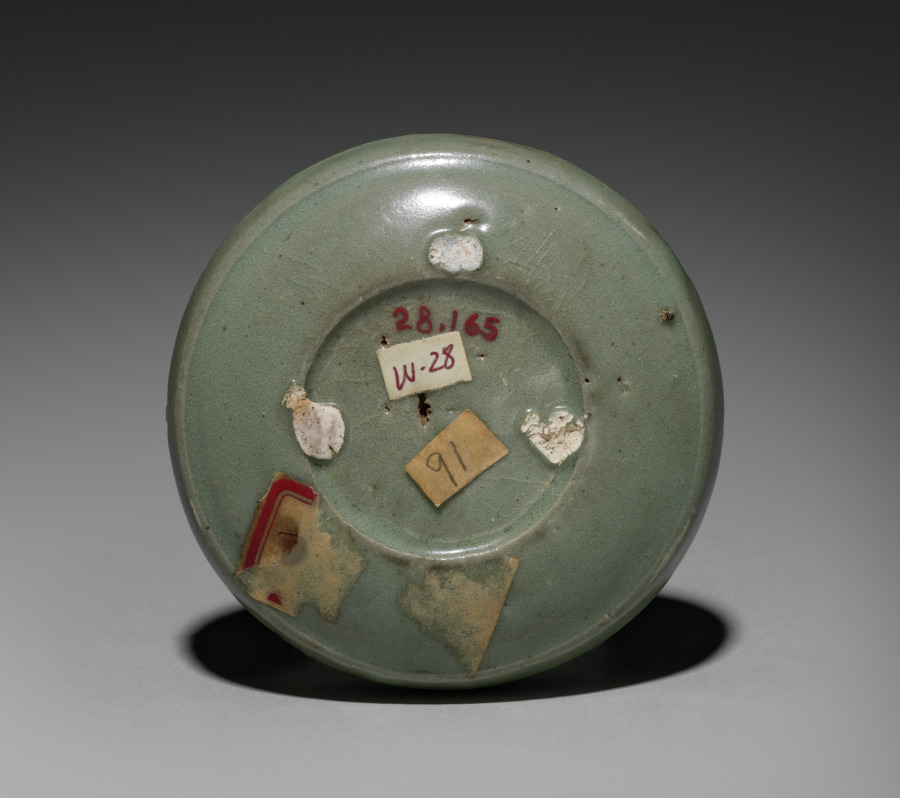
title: Pigment Box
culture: Korea, Goryeo dynasty (918–1392)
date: 918–1392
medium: inlaid celadon ware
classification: Ceramic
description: Celadons, spoons, seals, and bronze mirrors were the most common burial objects in tombs during the Goryeo period (918-1392). Once used to contain colored powder, rouge, and eyebrow gel for makeup, this small container was one of the standard goods that furnished elites' tombs. Both women and men used the grain powder of rice or millet for whitening their skin, safflower extract for rouge, and plant ash or soot for eyebrow gel. Yet, natural-looking make-up seems to have been the most favorable one in Korean according to the travelogue by Xu Jing (1091-1153), the Chinese diplomat who visited Korea in 1123.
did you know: This ceramic container was used to store either incense or cosmetics.